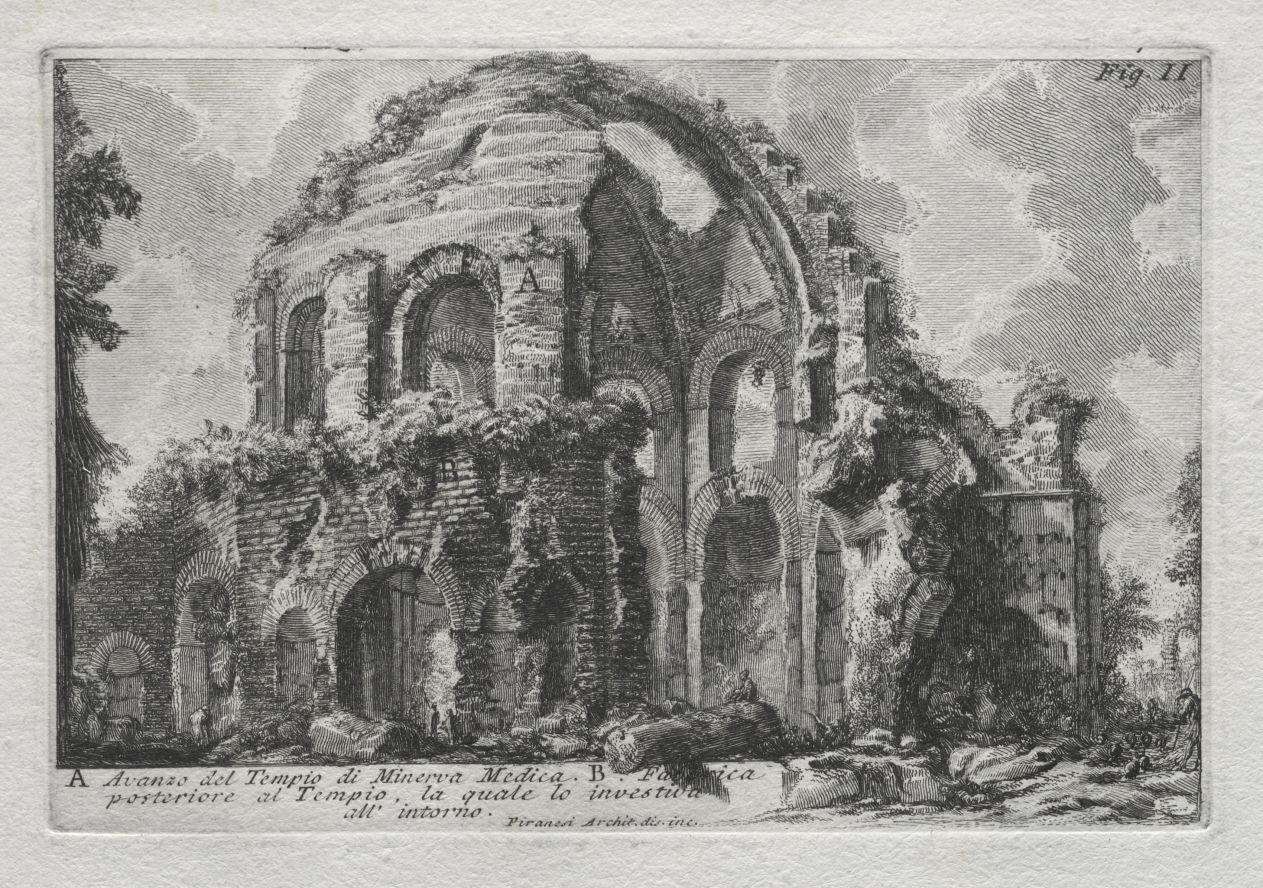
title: Avanzo del Tempio di Minerva Medica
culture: Italy, 18th century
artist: Giovanni Battista Piranesi (Italian, 1720–1778)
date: c. 1745–65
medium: etching and engraving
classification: Print